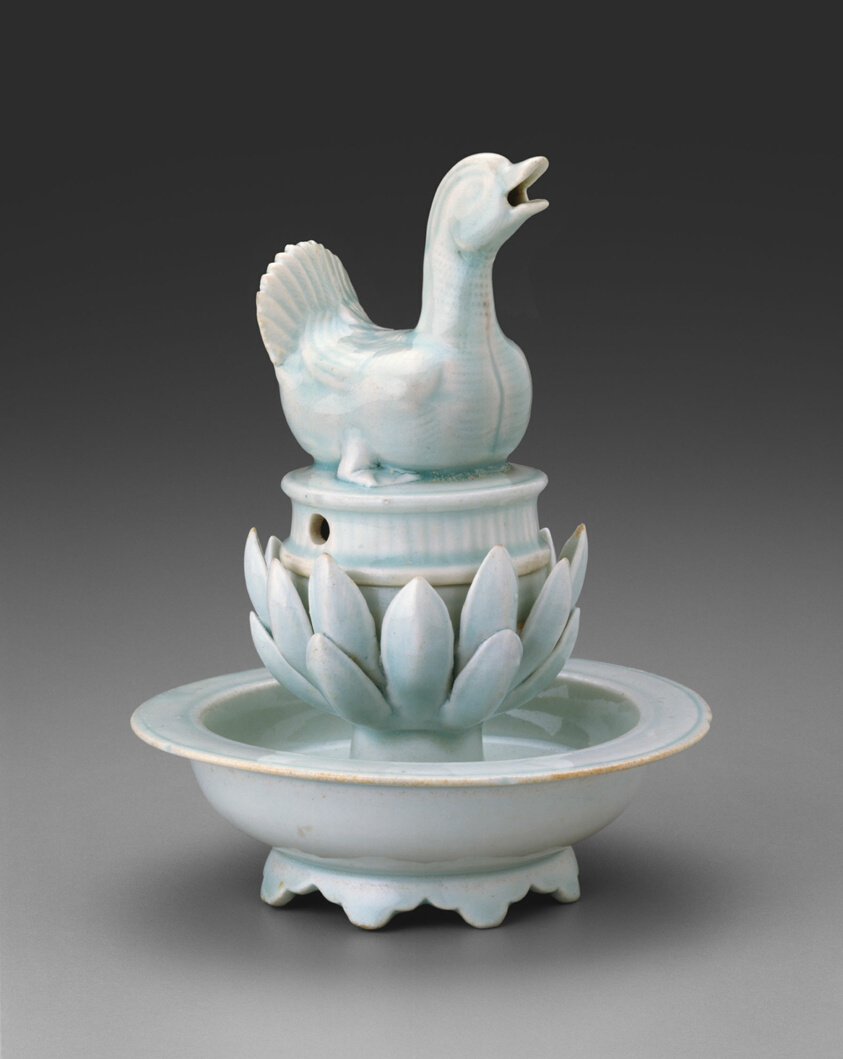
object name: Vessel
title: Incense Burner in the Form of a Duck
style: Chinese (culture or style), qingbai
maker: China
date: Song dynasty (960–1279), 12th century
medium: Qingbai ware; porcelain with underglaze molded and carved decoration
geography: China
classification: ceramics; asian art; vessel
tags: ducks, plants, plant-derived motif, animals, lotus